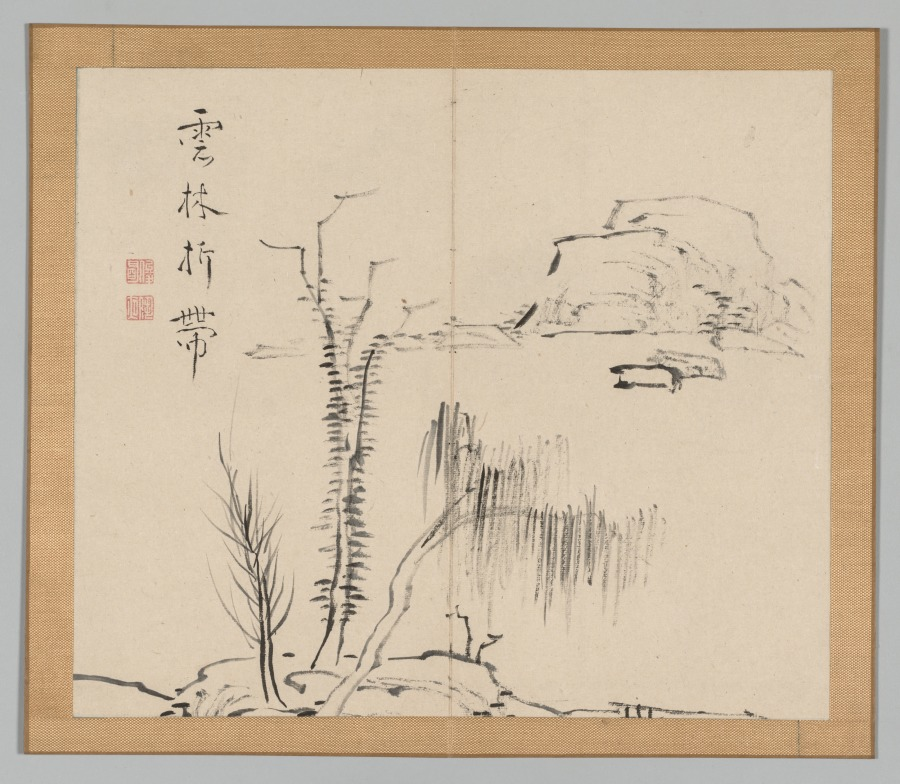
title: Reverberations of Taiga, Volume 2 (leaf 16)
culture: Japan, Edo period (1615–1868)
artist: Aoki Shukuya (Japanese, d. 1802)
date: mid- to late 1700s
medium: double-leaf from a pair of albums; ink and light color on paper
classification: Portfolio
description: Traditionally, young painters in Japan began their studies with an established master-painter. The master's compositions invariably became models that the apprentice copied to learn various ink and brush techniques. Shukuya was a pupil of the famous Kyoto artist Ikeno Taiga, whose style is reflected in these sketches of rocks, trees, and mountains.